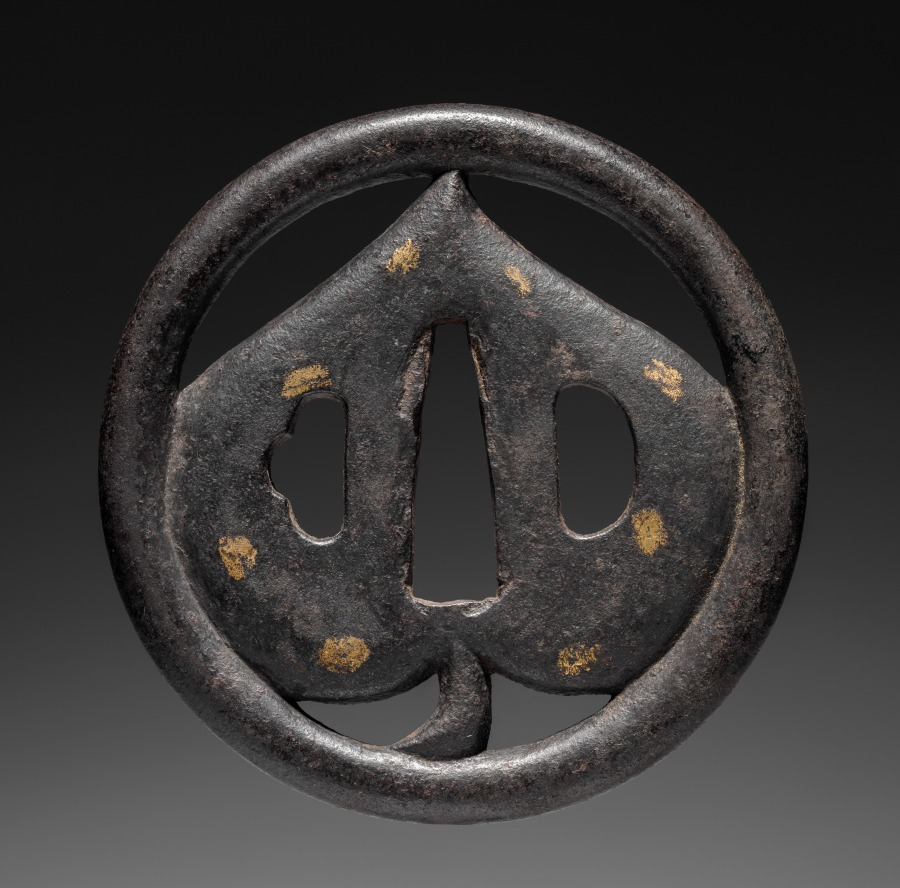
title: Sword Guard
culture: Japan, possibly Edo period (1615-1868)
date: c. 1615–1868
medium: iron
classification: Arms and Armor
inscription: signed: 信家